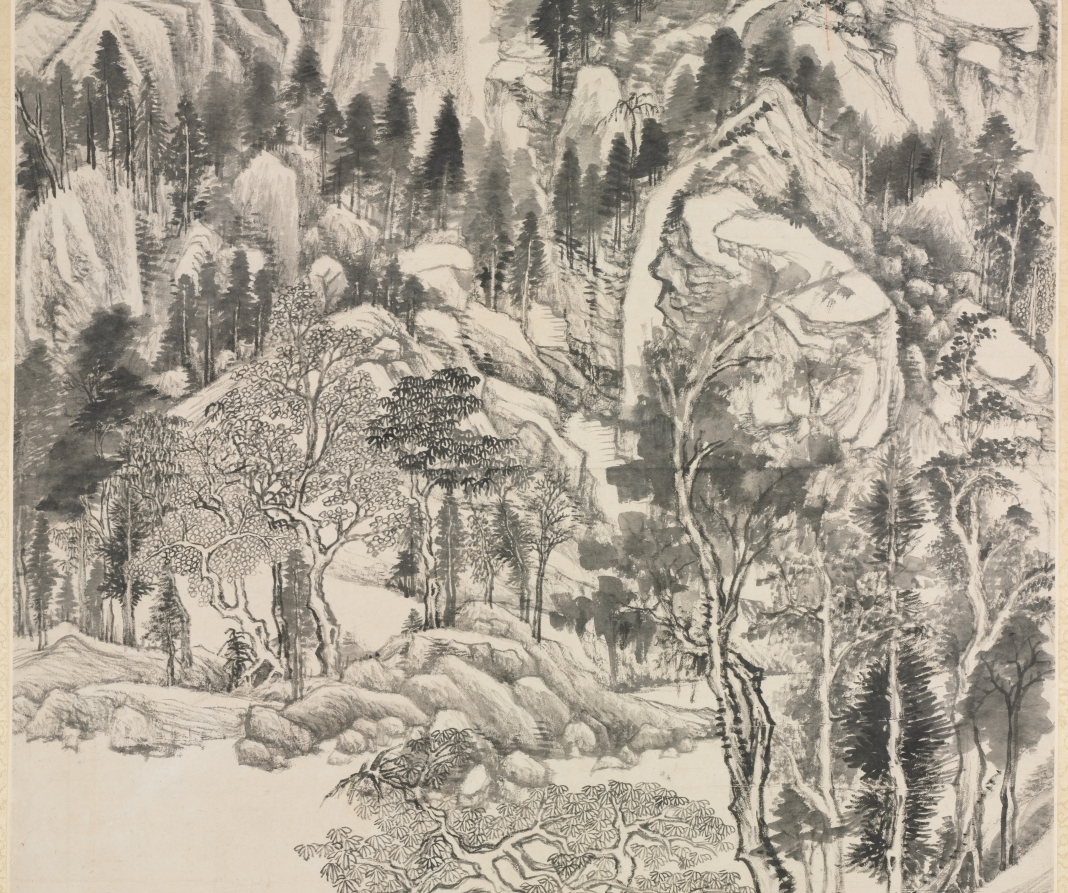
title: Mt. Qingbian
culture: China, Ming dynasty (1368–1644)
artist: Dong Qichang (Chinese, 1555–1636)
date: 1617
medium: hanging scroll, ink on paper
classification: Painting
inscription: Artist's first inscription, signature, and 2 seals: A painting of the Qingbian Mountains in the manner of Beiyuan [Dong Yuan]. In the summer of the dingsi year [1617], on the last day of the fifth month, [I] send this to my senior, Zhang Shenqi. Dong Xuanzai [seals] Zhi zhi hao ri jiang guan 知制誥日講官; Dong Qichang yin 董其昌印.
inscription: Artist's second inscription and signature: Piling irons for ten thousand feet guard the purple sky;/ Where puppies are seen on top of clouds, villages and marketplaces lie./ In the splendor of autumn, where is the most worthy spot to spend the day?/ Amid the rustling sounds of mountain streams, with a volume in hand, meditating on the Way [Dao]. Inscribed by Qichang. (trans. WKH/LYSL)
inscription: 4 additional seals: 3 of Li Enqing 李恩慶 (jinshi of 1833); 1 of Weng Wan-go 翁萬戈 (b. 1918).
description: Dong Qichang radically transforms the landscape composition into a purely abstract design. He organizes the mountain forms to achieve an overall sense of structure, activating the flow of energy (qi) and the momentum of force (shi) throughout the pictorial design. In his art, brush and ink assume life independent of the depicted forms, so that the painting can be appreciated for “the sheer marvels of brush and ink.”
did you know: Dong Qichang had visited the Bian Mountains, which are part of a low range located not far from Wuxing and Lake Tai in the southern province of Zhejiang.